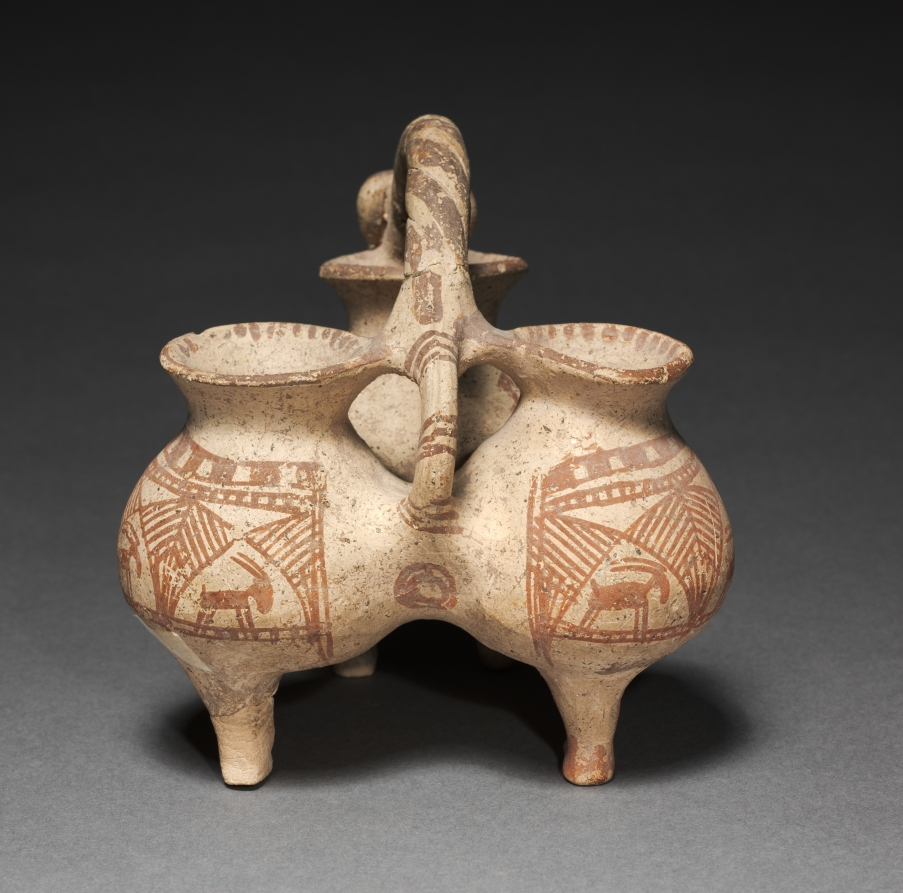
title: Three-Part Pitcher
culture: Iran, Luristan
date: c. 800–700 BCE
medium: earthenware, unglazed slip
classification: Ceramic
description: This unusual tripartite pitcher is made of three jugs joined together, a twisted handle, and a ram’s head atop a spout. Four feet connect to the pitchers, adding stability and an animal-like form. Ibexes, diamonds, and crosses, all painted in red slip, decorate the clay surface. This work is likely Baba Jan III ware from the Iron Age site Baba Jan in northwestern Iran. The pitcher is functional but may have served a ritual purpose.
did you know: The ram’s head was created separately before being attached to the spout.